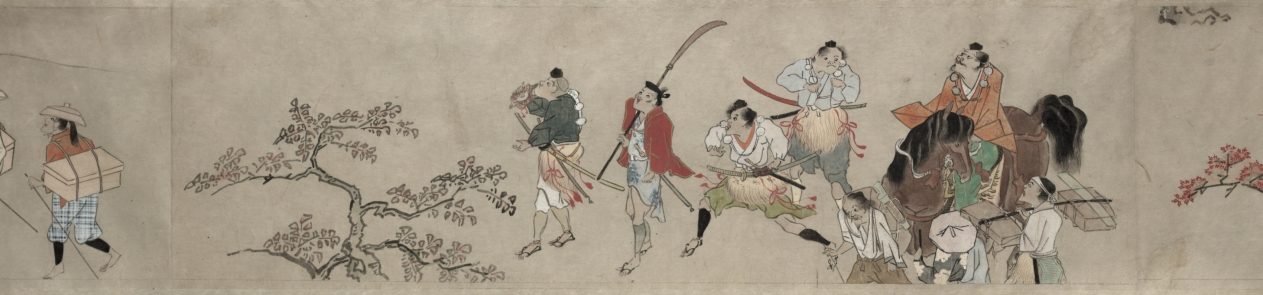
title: The Saltmaker's Story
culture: Japan, Edo period (1615–1868)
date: early 1600s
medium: One of a pair of handscrolls; ink, color, and gold on paper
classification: Painting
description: Once read and copied by girls at New Year’s celebrations and included in dowries, The Saltmaker’s Story is a rags-to-riches tale in which daughters are gifts from the gods. Despite his simple outlook, the main character progresses from humble roots as an associate at Kashima Shrine to the elite status of grandfather of the emperor through the intervention of the Kashima deity. The Saltmaker’s Story is traditionally presented in a set of three scrolls, but the text of this set has been removed by a previous owner, who remounted the illustrations as a pair. The paintings of this one take us from right to left through the first half of the tale.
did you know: This handscroll originally had texts before its paintings, but the texts were removed.